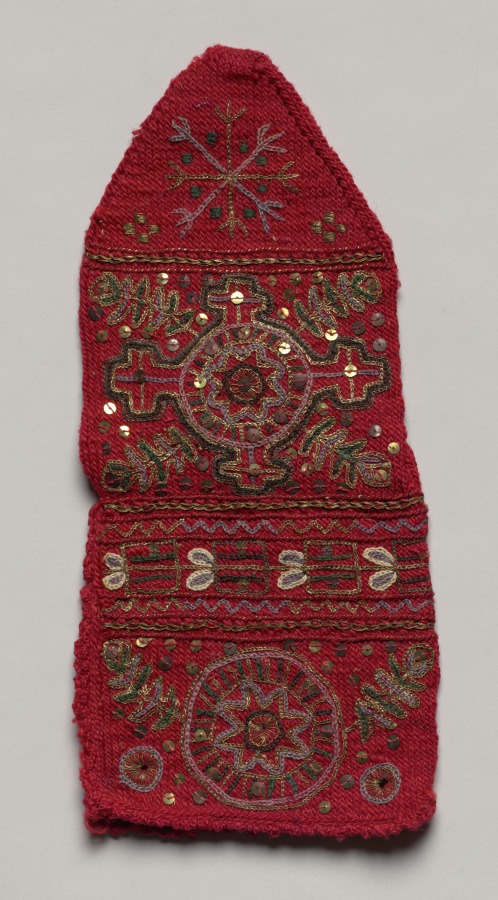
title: Woman's Bridal Socks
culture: Yugoslavia, Serbia, 20th century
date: early 1900s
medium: embroidered wool, gold thread, sequins, knitting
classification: Knitting